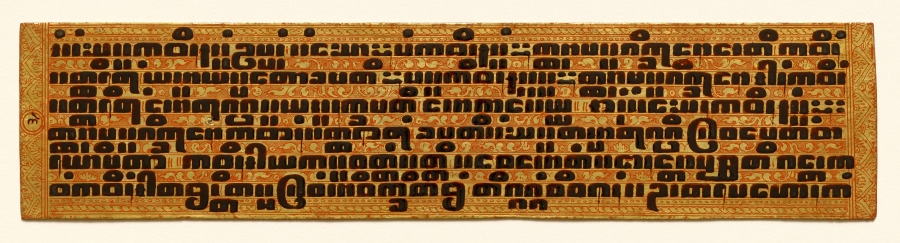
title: Text, folio 8 (verso) from a Kammavacha: Buddhist ordination text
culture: Myanmar (Burma)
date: 1800s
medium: Leaf: lacquer and gilding on cloth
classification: Manuscript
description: In premodern Burma, lay people commissioned lavishly ornamented manuscripts for ceremonial occasions, when officiants would read aloud from the text. Written in black lacquer, the text is in the language of Pali written in a Burmese script. It contains ordination rites and procedures for monastic ceremonies. The second to last page is covered with intricately drawn, winged celestial beings (nats) in gestures of praise. They fly amid intertwining vegetation—denoting bounty—that grows from serpentine forms that refer to rain clouds. Lionlike forms inhabit the space with them. The top and bottom covers are equally ornamented with jeweled floral patterning.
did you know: The Pali text of this manuscript is written in Burmese square script, which is also known as "tamarind seed script."